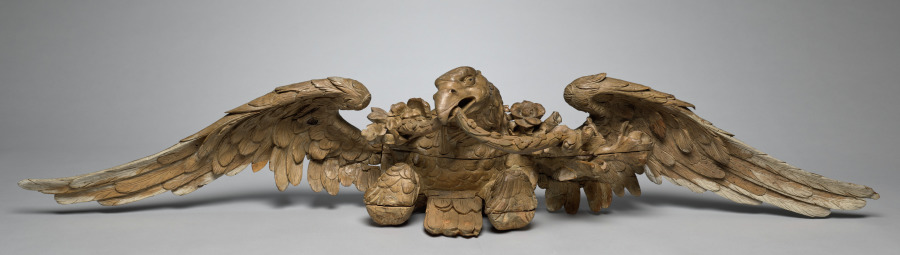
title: Centerpiece of a Carving from an Overmantel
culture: England, 17th century (Charles II)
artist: Grinling Gibbons (British, 1648–1721)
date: c. 1675–1677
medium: lindenwood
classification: Sculpture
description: The arrangement of architectural elements within grand interior spaces in the late 1600s and early 1700s emphasized symmetry and height. Decorative elements such as elaborately carved mantels, mirrors, paintings, and applied wall decorations were often stacked to achieve a visual focal point at one or both ends of the room. This particular overmantel decoration once hung above the fireplace in the Green Drawing Room of the Earl of Essex at Cassiobury in Watford, near London. In 1823, the British painter William Henry Hunt (1790–1864) produced a watercolor of the drawing room which featured this overmantel decoration. Grinling Gibbons was born in Rotterdam, the Netherlands, of English parents. After training there as an artist, he came to England in the 1660s and soon began to work as a sculptor of interior ornament, particularly in wood. One of his first large-scale decorative projects was the series of interiors at Cassiobury House.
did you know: The swags of fruit and foliage featured in this wooden overmantel decoration evoke the bounty of the English countryside.